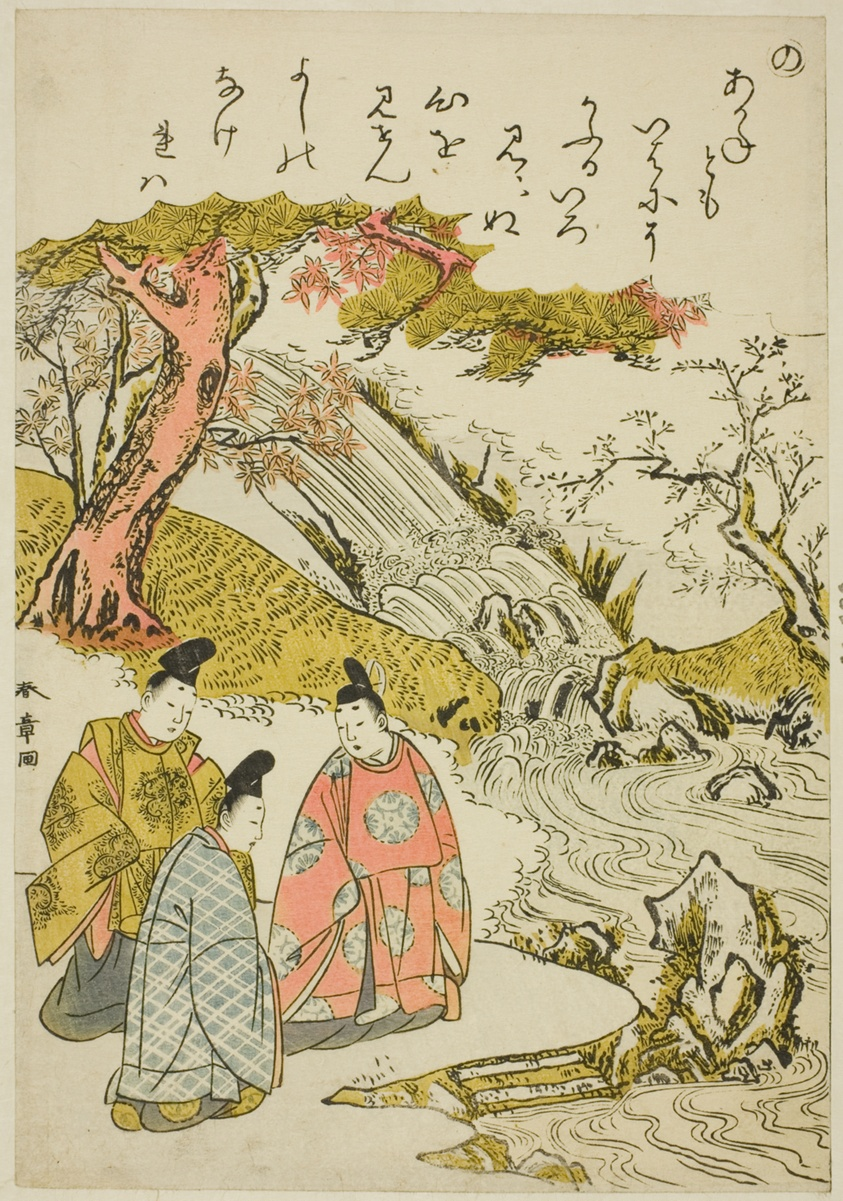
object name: Print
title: "No," from the series "Tales of Ise in Fashionable Brocade Pictures (Furyu nishiki-e Ise monogatari)"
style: Japanese (culture or style)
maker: Katsukawa Shunsho 勝川 春章; Japanese, 1726-1792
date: c. 1772/73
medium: Color woodblock print; koban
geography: Japan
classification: woodblock print; print; asian art